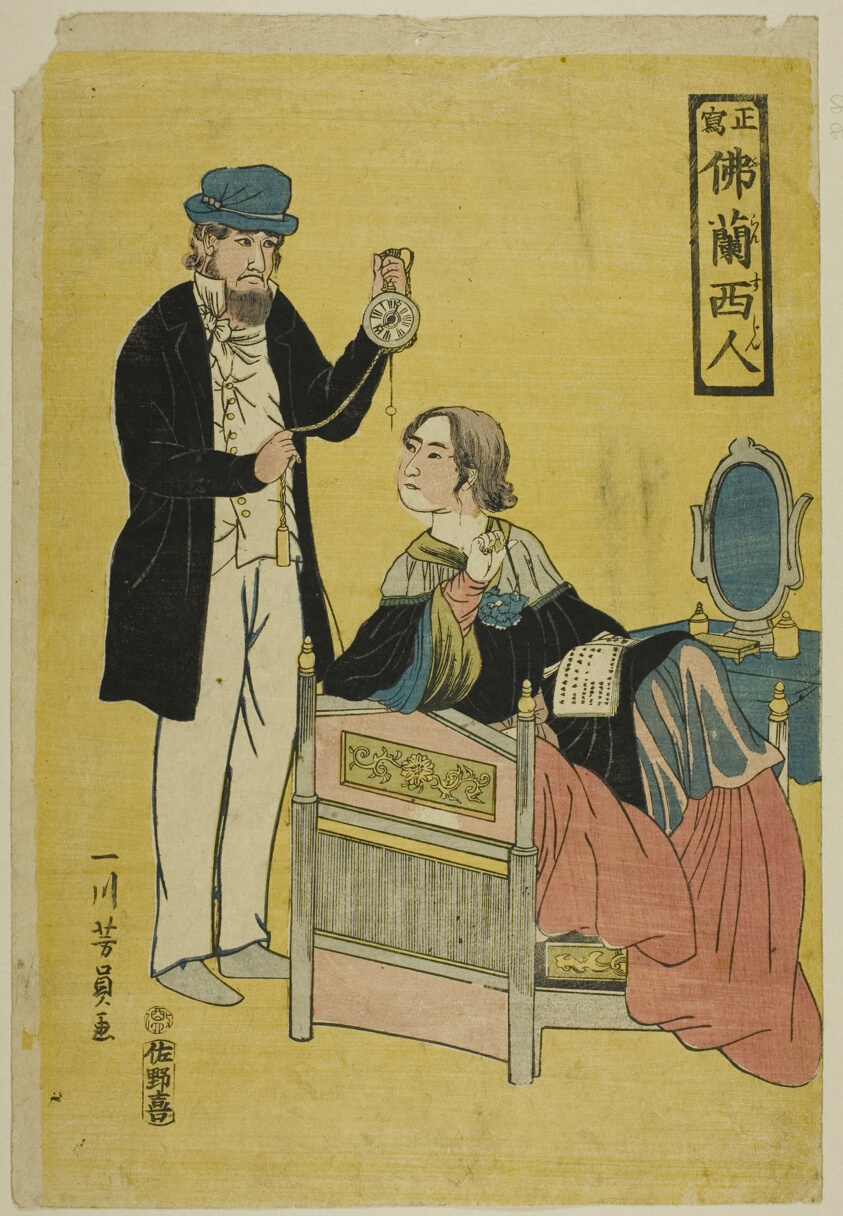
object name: Print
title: True Picture of the French (Shosha Furansujin)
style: Japanese (culture or style)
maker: Utagawa Yoshikazu (Japanese, active c. 1850-70)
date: 1861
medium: Color woodblock print; oban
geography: Japan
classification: woodblock print; print; asian art